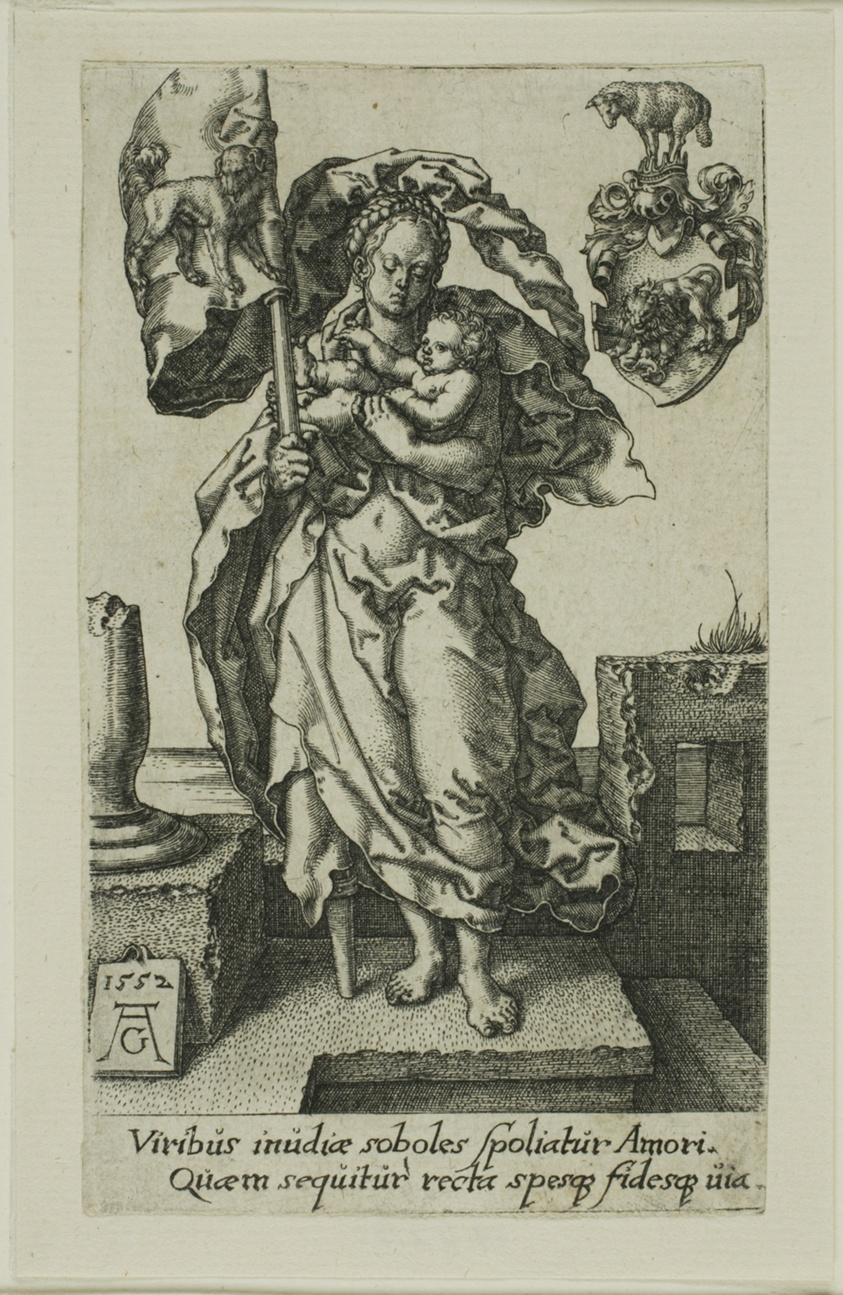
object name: Print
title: Compassion, from the Virtues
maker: Heinrich Aldegrever (German, 1502-c.1560)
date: 1552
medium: Engraving in black on ivory laid paper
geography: Germany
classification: engraving; print; prints and drawing